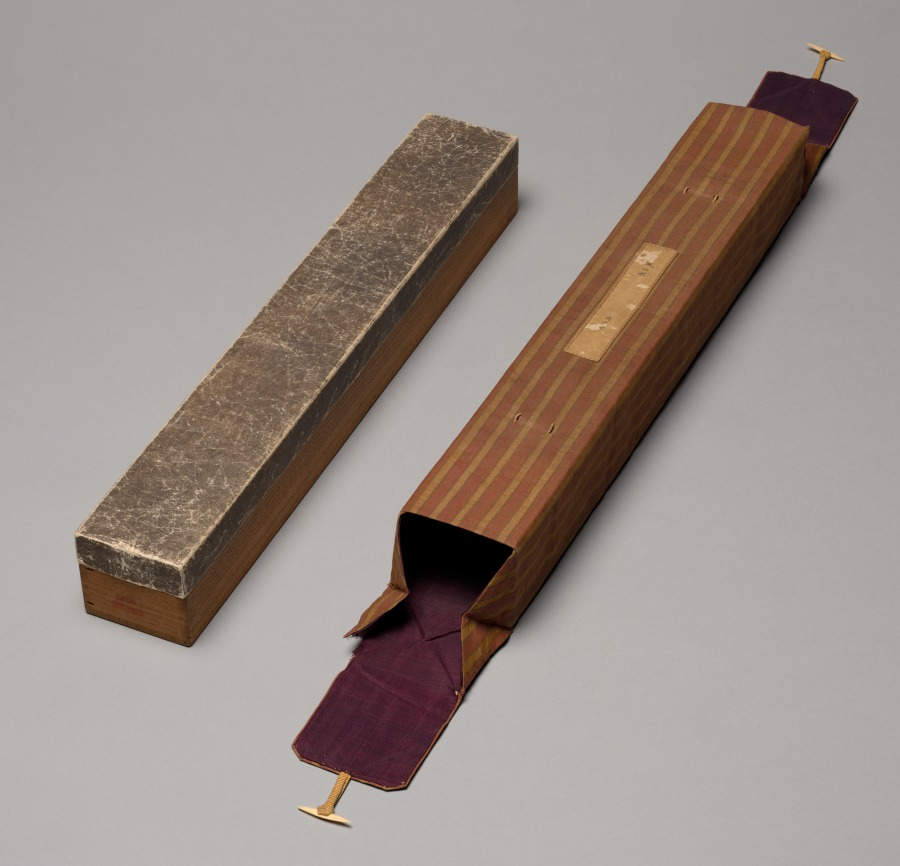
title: Windy Landscape with Sailboat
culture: Japan, Muromachi period (1392–1573)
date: mid-1400s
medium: hanging scroll; ink on paper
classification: Painting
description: Windy Landscape depicts the humble waterside retreat of an official retired from government service. For government officials, retreating from the city to a remote locale was the ideal retirement, though difficult to attain. In this scroll the retiree gazes out over the watery expanse past the sailboat to the mist-covered mountain in the far distance. The artist has achieved this depth of composition through carefully placed brushstrokes and ink washes.